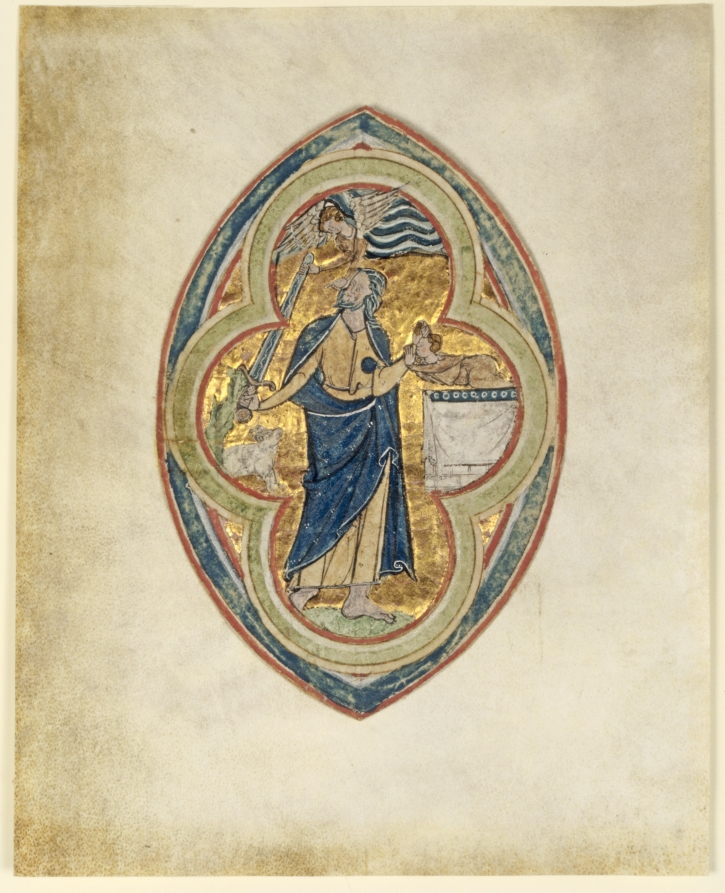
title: Miniature Excised from a Compendium in historiae genealogia Christi by Peter Poitiers: The Sacrifice of Isaac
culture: England, London, 13th century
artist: workshop of William de Brailes (English, active c. 1230)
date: 1200–1250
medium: ink, tempera, and gold on vellum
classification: Manuscript